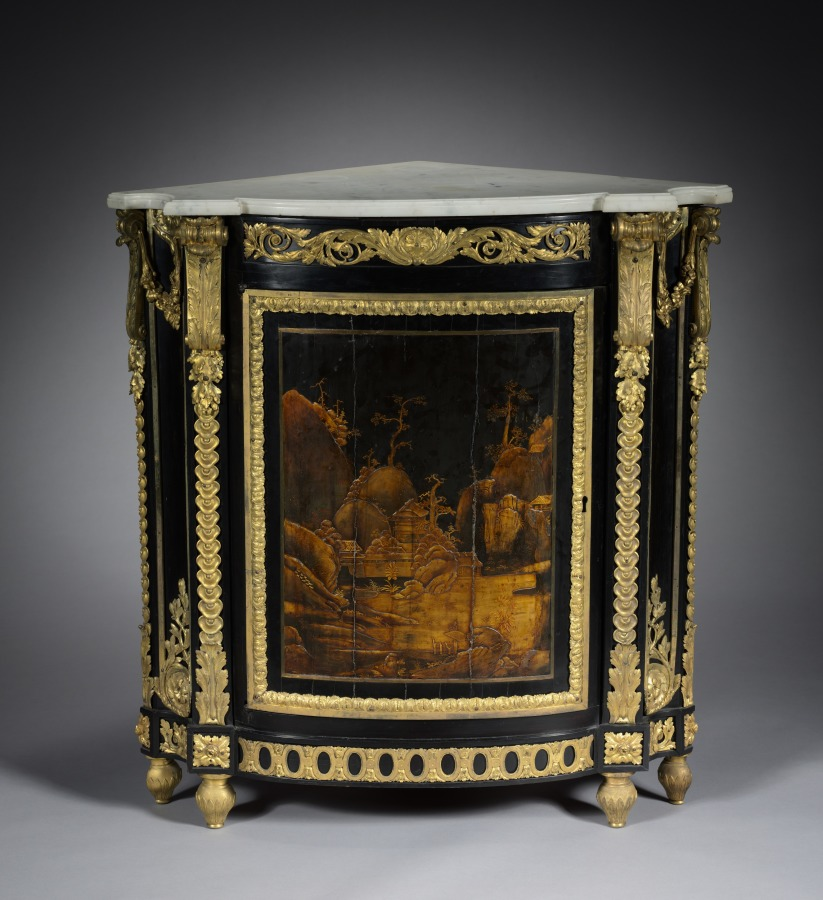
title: Corner Cabinet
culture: France, Paris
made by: René Dubois (French, 1737–1798)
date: c. 1765–1770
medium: ebony veneer, Japanese lacquer, gilt bronze mounts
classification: Furniture and woodwork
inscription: signed: I. Dubois.